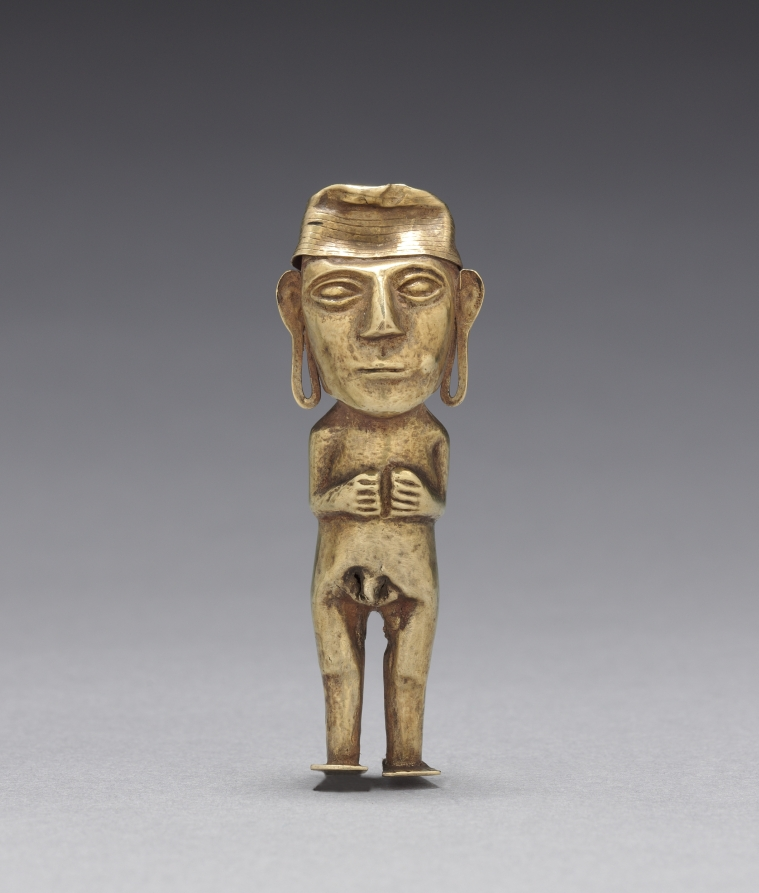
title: Male Figurine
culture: Peru, Lambayeque Valley, Inka style (1400-1532)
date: 1400–1532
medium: hammered gold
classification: Metalwork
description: Precious metal was a major Inka artistic medium, but most was melted down after the conquest to fund the Spanish court. The sole remains are small-scale objects from tombs and offerings. Figurines like this have been found at shrines on sacred mountain peaks, where they accompanied child sacrifices in offerings made during times of crisis, such as famine.